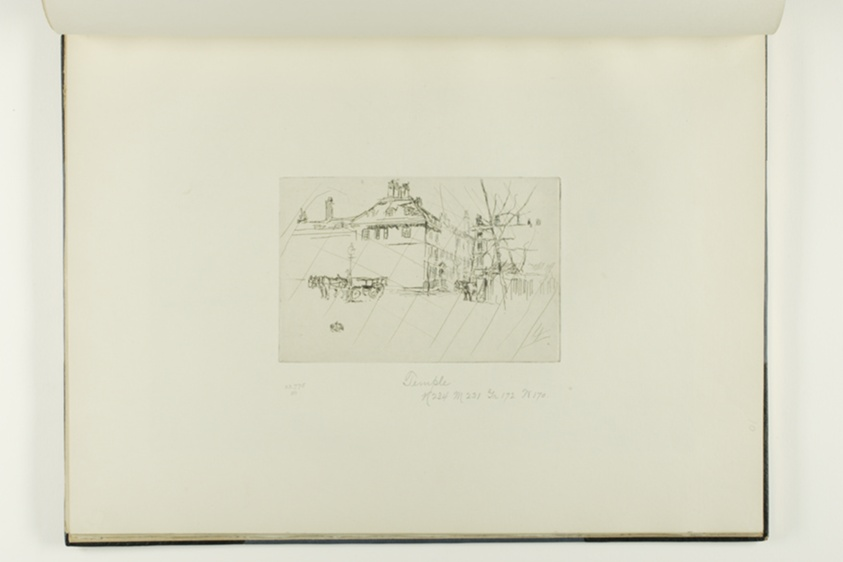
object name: Print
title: The Temple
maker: James McNeill Whistler (American, 1834-1903)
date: 1880/81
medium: Etching, with drypoint cancellation, in black ink on ivory laid paper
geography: United States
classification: etching; prints and drawing; print; drypoint; book; paper